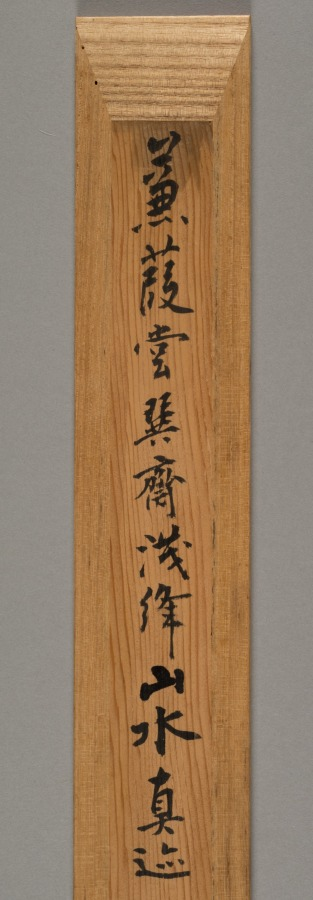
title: Courtesan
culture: Japan, Edo period (1615–1868)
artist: studio of Kaigetsudō Ando (Japanese, c. 1671–1743)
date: 1700s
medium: hanging scroll; ink and color paper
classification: Painting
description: Paintings of the courtesans who provided men with a sophisticated menu of appealing fashions, flattery, witty banter, music, dancing, and sexual services in the Yoshiwara district of the city of Edo (Tokyo) were the bread and butter of the Kaigetsudō studio, in whose style this work is painted. Their paintings emphasized bold, sweeping calligraphic ink lines in rendering the figures’ forms, along with high-contrast colors and patterns in their typically solitary subjects’ garments. Aside from the occasional prop or poem, the space around the dramatic figure was left entirely blank.